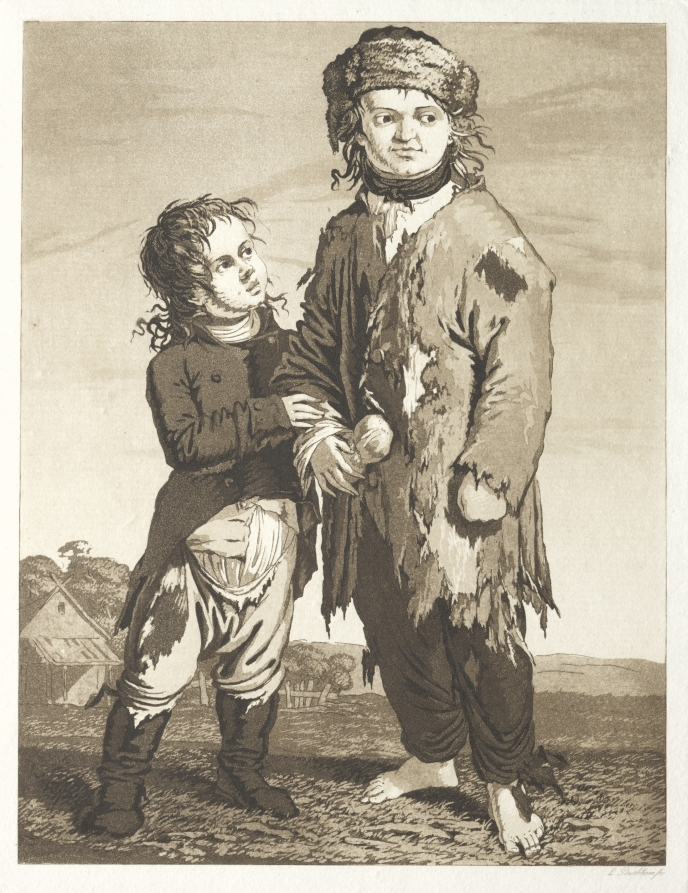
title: The Young Beggars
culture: Germany, late 18th-early 19th century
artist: Karl Ludwig Bernhard Buchhorn (German, 1770–1856)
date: c.1800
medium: aquatint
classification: Print